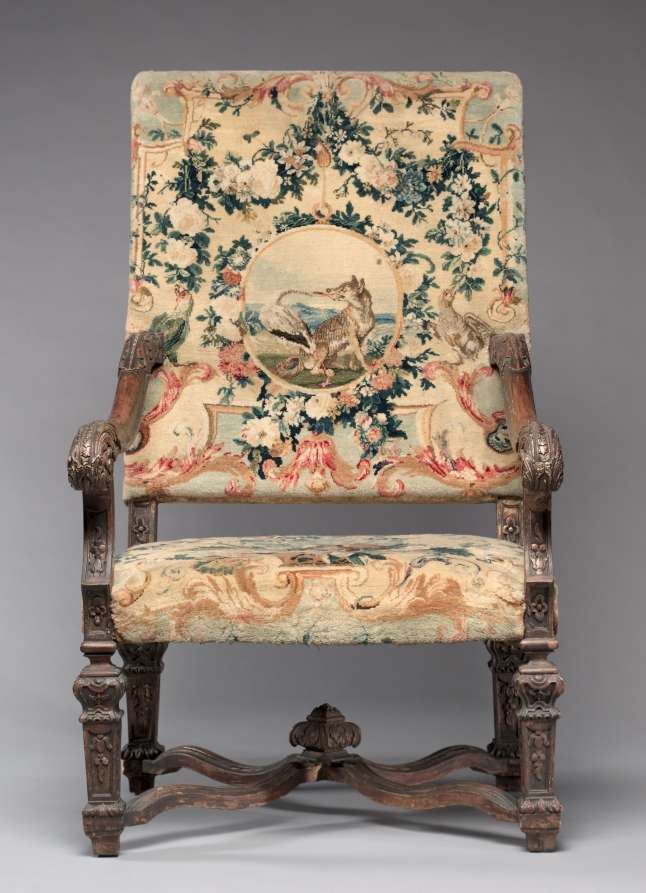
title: Armchair (1 of 4)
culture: France, 18th century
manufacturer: Royal Savonnerie Manufactory, Chaillot Workshops (French, est. 1627)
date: before 1717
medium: carved wood, Savonnerie knotted-pile (symmetrical rug knot) upholstery; wool, hemp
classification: Furniture and woodwork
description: These chairs belong to a suite that includes a settee (also in the CMA’s collection) and a tapestry made for a count and countess to mark their wedding in 1717. Furniture of this scale was usually placed against the wall in grand reception halls, more as a display of wealth than for use. Upholstered in Savonnerie tapestries, this suite was among the most treasured and expensive example anyone could own and typically reserved for royalty. To add decorative and intellectual interest to the textiles, weavers incorporated symbols depicting various stories from the Fables of Jean de La Fontaine, published from 1668 to 1694 and largely adapted from Aesop and other early storytellers.